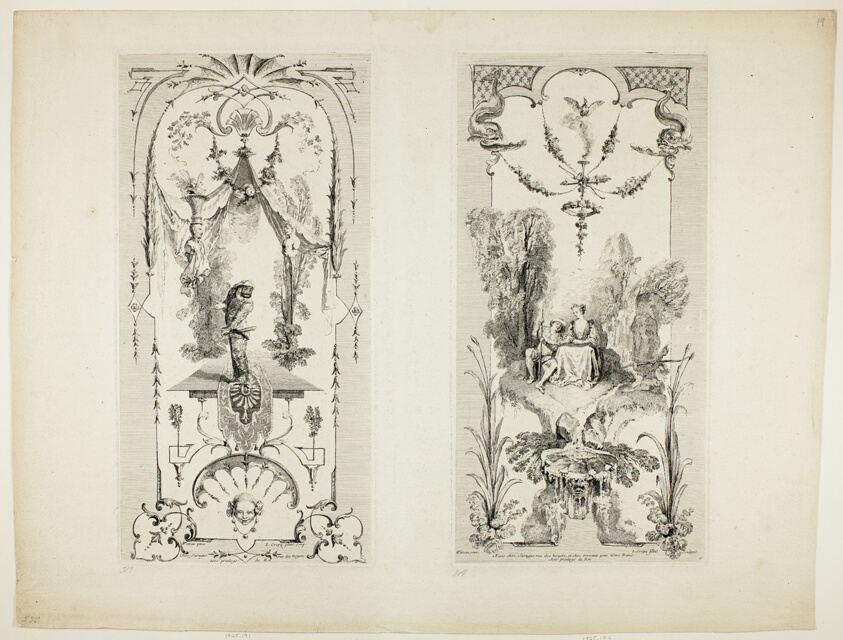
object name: Print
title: Screen of Six Sheets (313 & 314)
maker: Louis Crépy, Jr. (French, 18th century)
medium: Etching on paper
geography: France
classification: engraving; print; prints and drawing